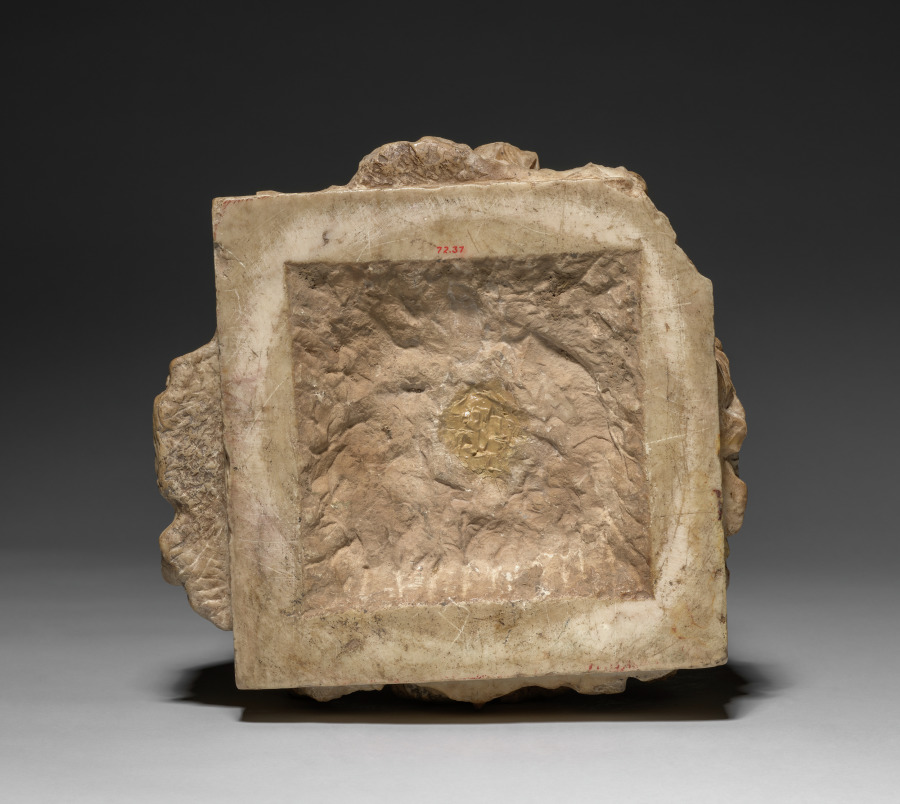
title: Square Urn with Celestial Guardians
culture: China, Tang dynasty (618–907)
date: 700s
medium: marble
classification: Sculpture